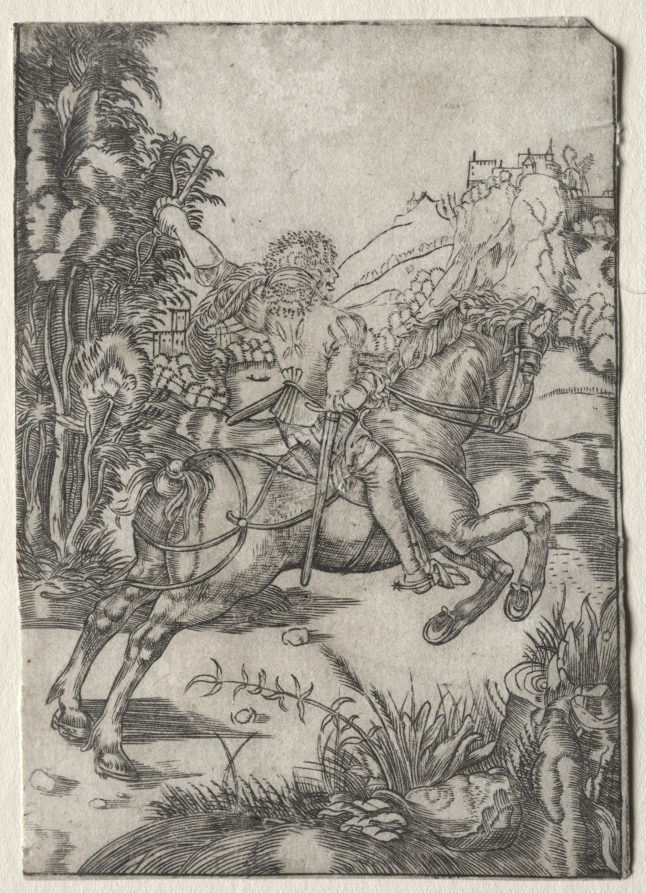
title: The Little Courier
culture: Germany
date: 1500s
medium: engraving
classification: Print